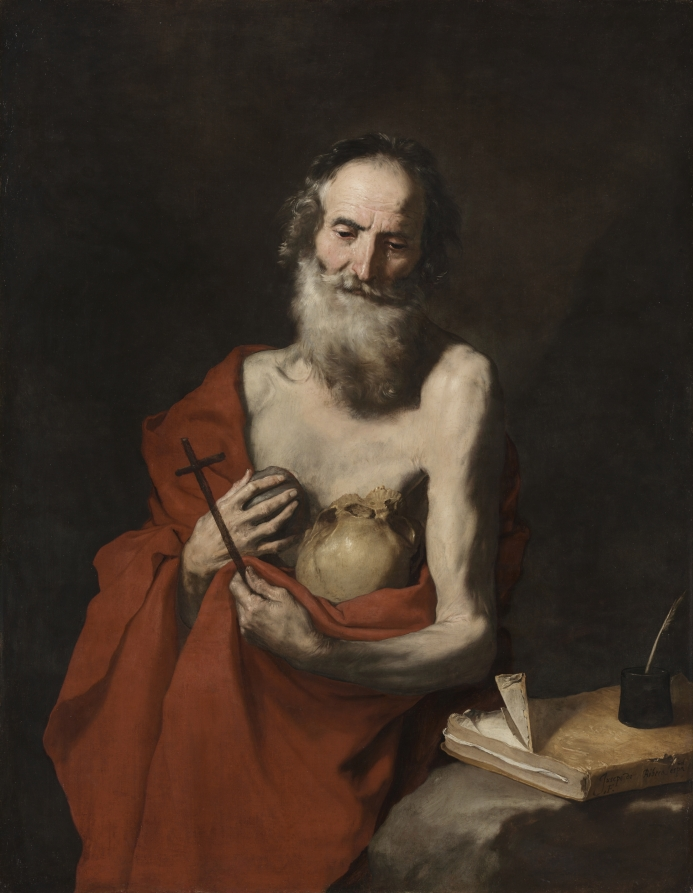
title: Saint Jerome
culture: Spain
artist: Jusepe de Ribera (Spanish, 1591–1652)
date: c. 1638–40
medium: oil on canvas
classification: Painting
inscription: Signed lower right: "Jusepe de Ribera espa[ñol]. F."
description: Saint Jerome (about ad 347–420) translated biblical texts into Latin. Although he sometimes appears as a scholar in his study, Ribera represents him here as a penitent who withdrew to the desert, beating his chest with a stone to emulate Christ’s suffering and contemplating a skull symbolizing human vanity. Working in Naples, Ribera enthusiastically adapted Caravaggio’s characteristic use of light and dark and naturalistic models.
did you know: Ribera signed the painting on the spine of the book in which Jerome will write.